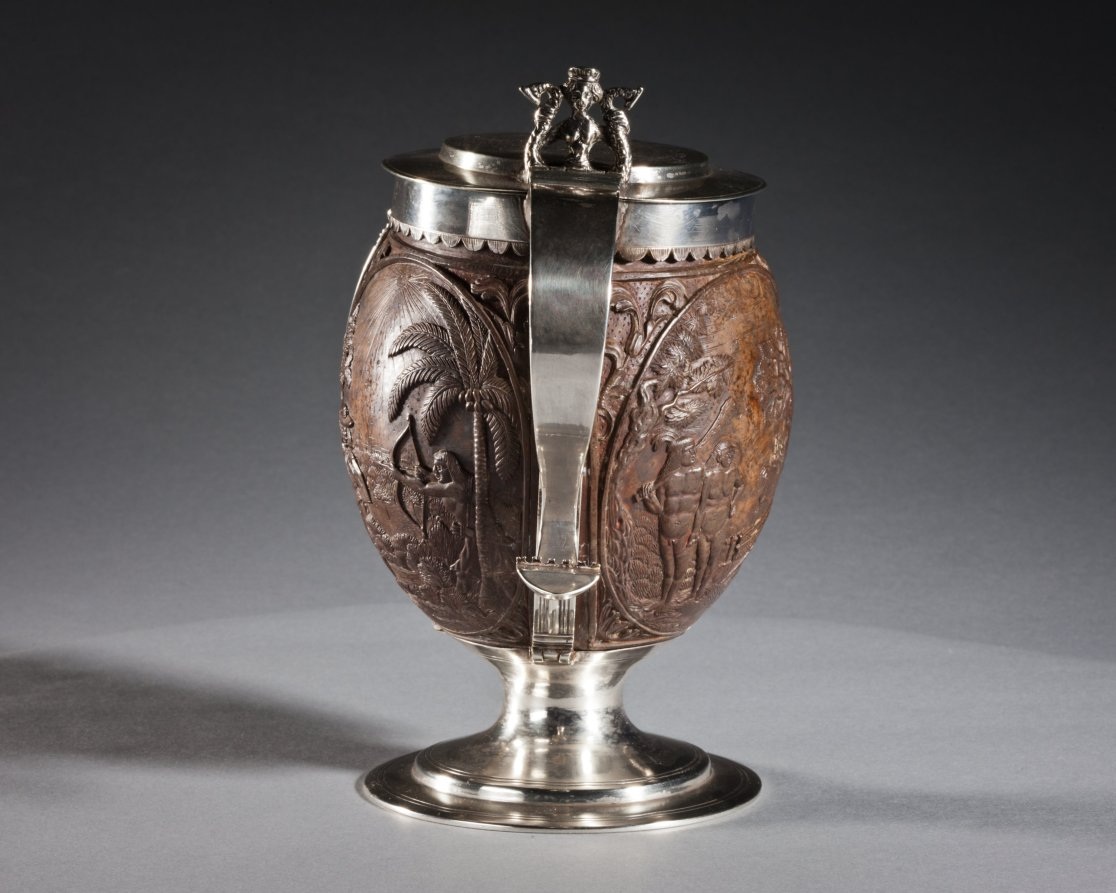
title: Coconut Cup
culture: carved coconut, probably The Netherlands; silver mount, probably England, 17th century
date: c. 1630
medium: carved coconut in silver mount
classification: Metalwork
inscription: top lid has engraved coat-of-arms, underside of lid has inscription: George Lewis TIVERTON Feby, 1st 1760.